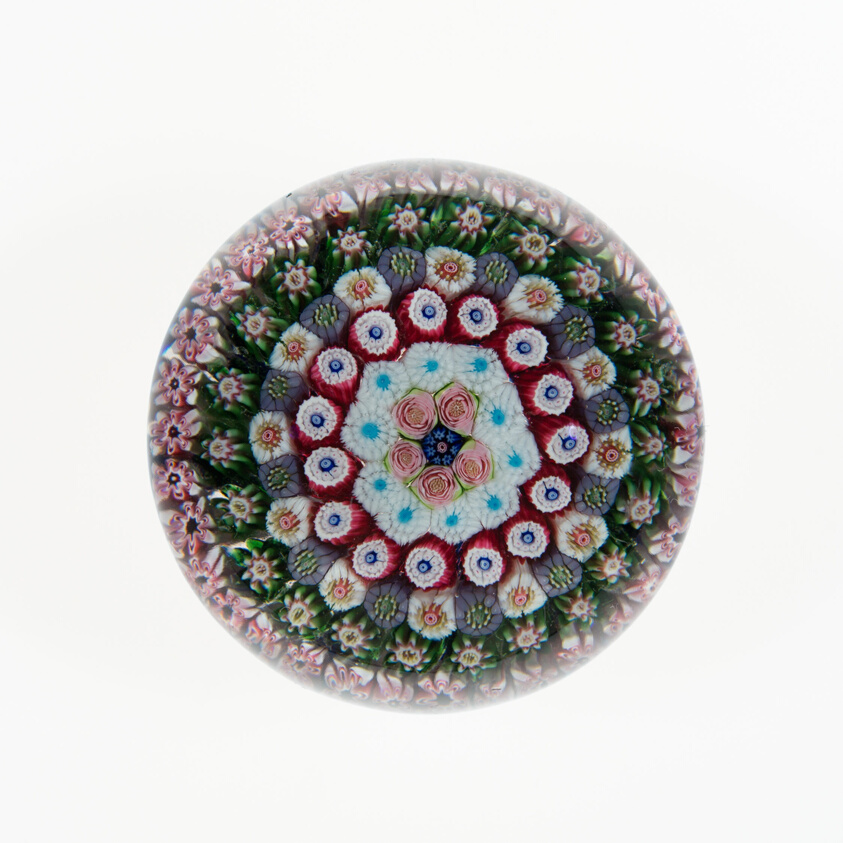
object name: Glass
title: Paperweight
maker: Clichy Glassworks (Cristalleries de Clichy); Clichy, France, 1837-1885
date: 19th century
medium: Glass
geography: Clichy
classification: paperweight; millefiori; european decorative arts; glass